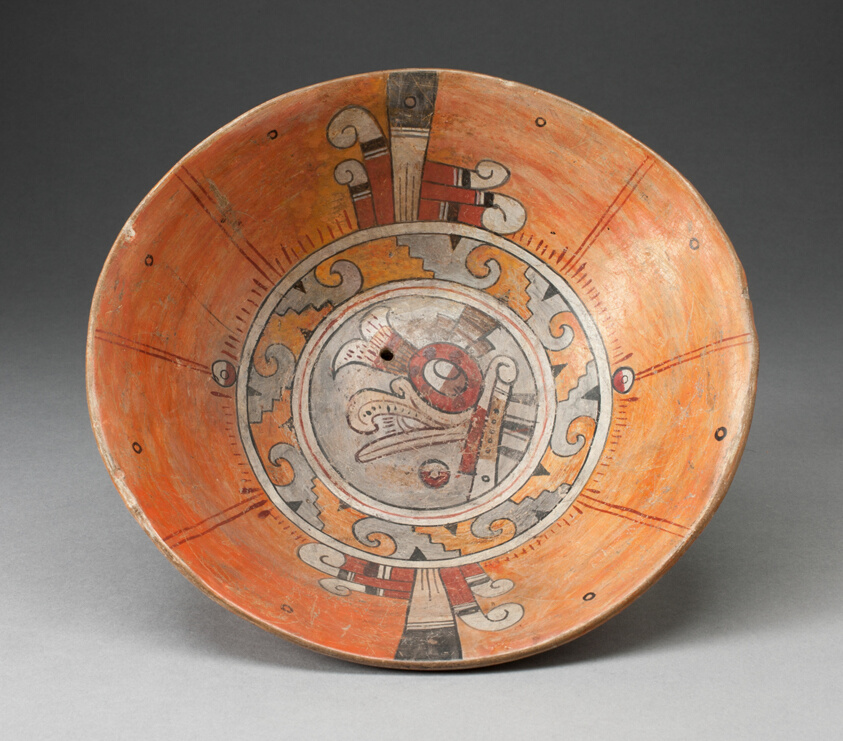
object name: Vessel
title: Tripod Bowl Depicting Head of Bird on its Interior Surface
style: cholula, Arts of the Americas, mesoamerican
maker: Cholula, Mixteca-Puebla style; Puebla, central Mexican highlands, Mexico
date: 1200–1521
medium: Ceramic and pigment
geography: Cholula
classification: bowl; earthenware; ceramics; vessel; art of the americas